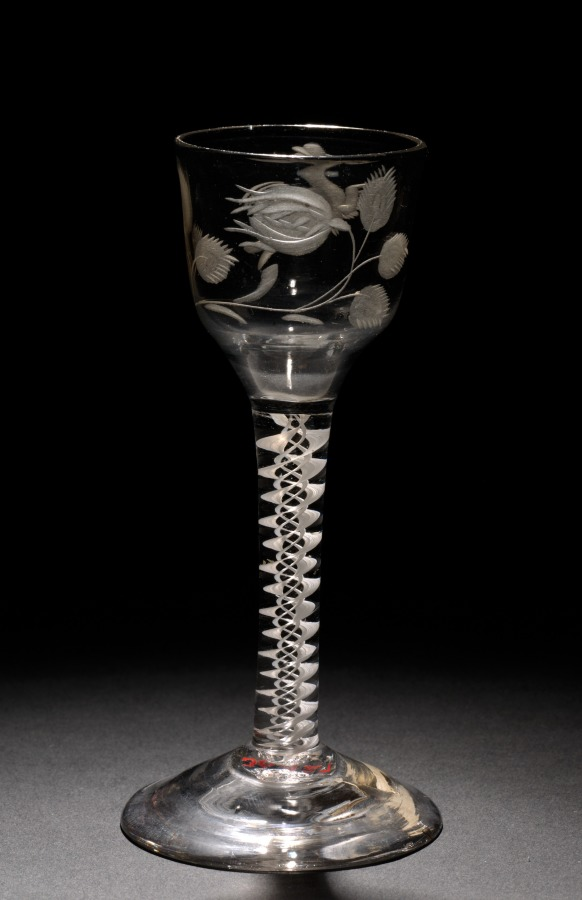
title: Wine Glass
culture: England, 18th century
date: 1750–1799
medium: glass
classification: Glass